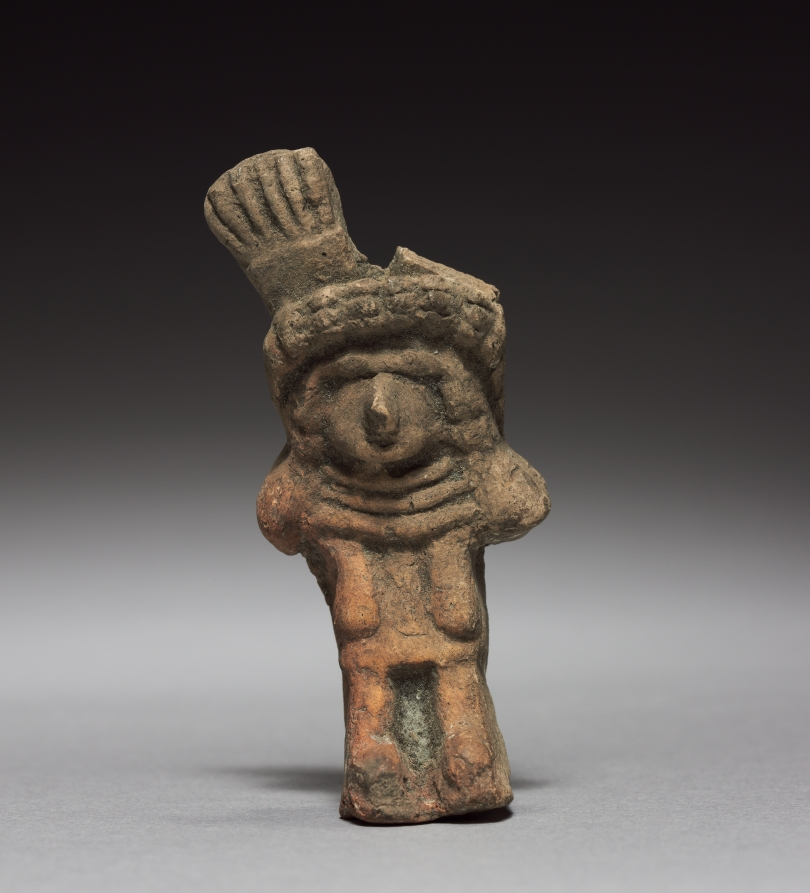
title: Figurine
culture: Mexico, Aztec, 14th century-16th century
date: 1325–1521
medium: terracotta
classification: Ceramic